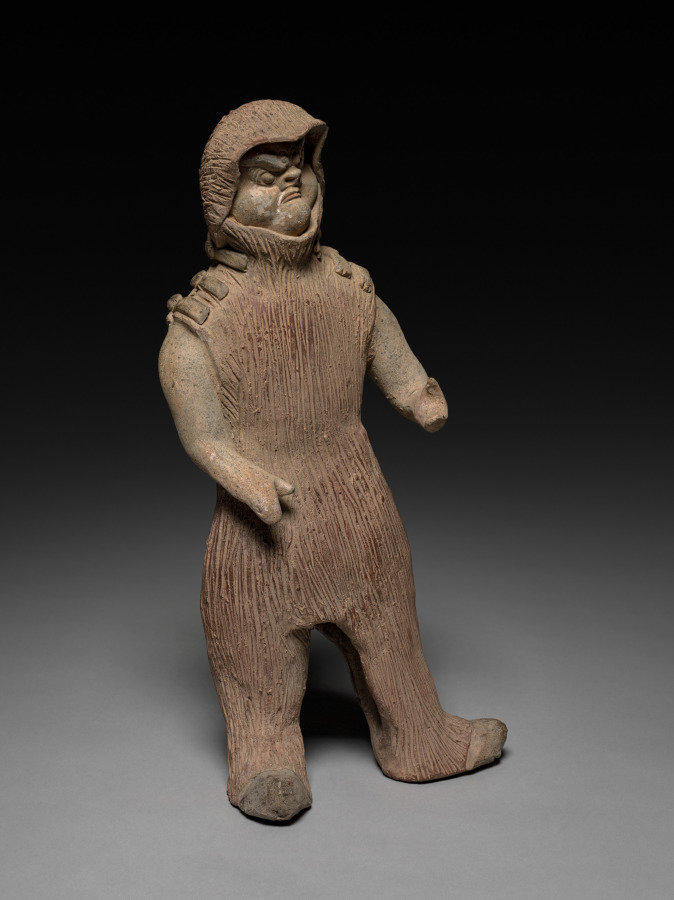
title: Figure of a Warrior in Leather Armor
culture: China, Modern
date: 20th Century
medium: buff earthenware with traces of polychromy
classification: Sculpture